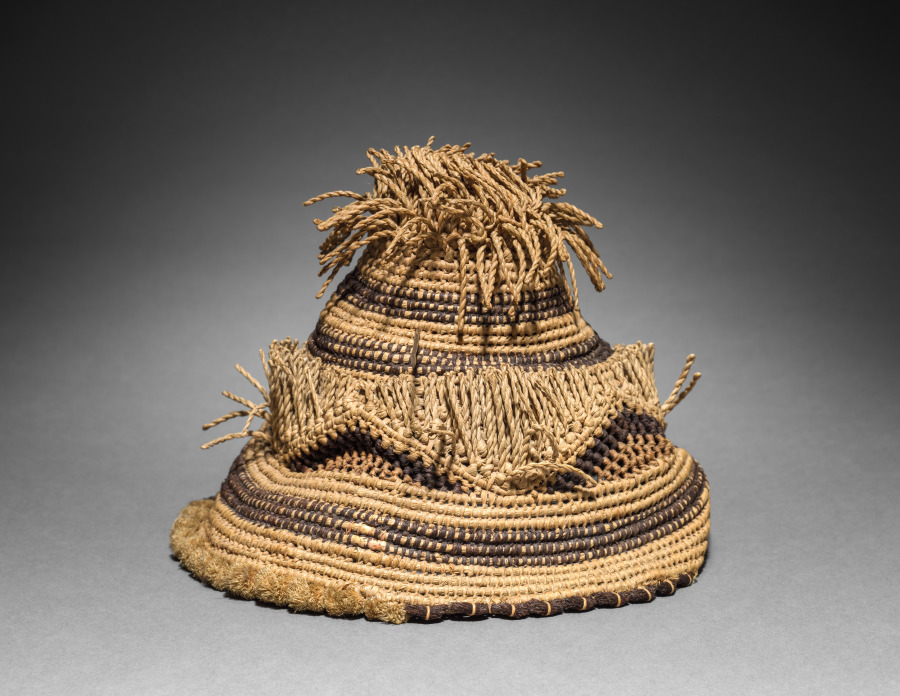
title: Hat (laket mishiing) with Pin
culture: Africa, Central Africa, Democratic Republic of Congo, early 20th century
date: early 1900s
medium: Raffia, metal, and dye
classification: Garment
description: Titled Kuba men and prominent women wear the laket, a small ornate dome-shaped hat. An essential fashion item of adult men in good social standing, it focuses special attention on the head as a significant marker of individual identity, ethnic affiliation, status, and role in society. This prestige object is secured on the crown of the head with a nine-and-a-half-inch metal pin that pierces through the hat onto a clump of hair. The laket is made from raffia palm fiber coiled into threads and woven in two alternating patterns and contrasting light and dark (dyed) wefts. There are two examples of the laket: the plain type with the flat top, and the more elaborate type called the laket mishiing.